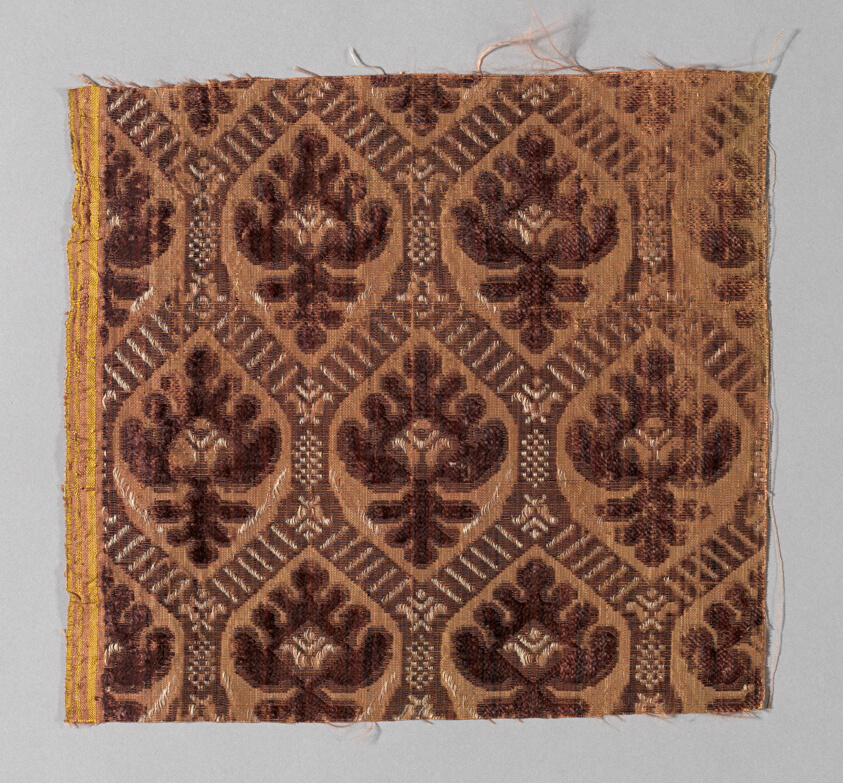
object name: Textile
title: Fragment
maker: Italy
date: 1625/75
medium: Silk, plain weave with supplementary patterning warps and supplementary pile warps forming cut, uncut, and voided velvet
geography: Italy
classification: textile; weaving - velvet; weaving